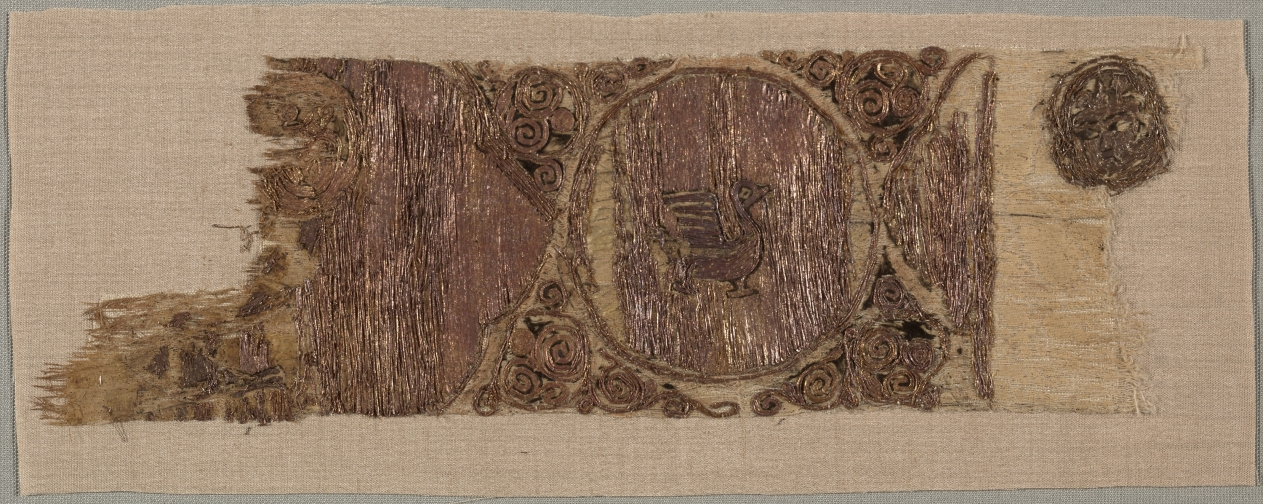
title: Fragment of an Embroidery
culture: Iran or Iraq, Seljuk period, 12th century A.D.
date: 1100s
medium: embroidery in silk and gold filé on mulham tabby ground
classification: Embroidery